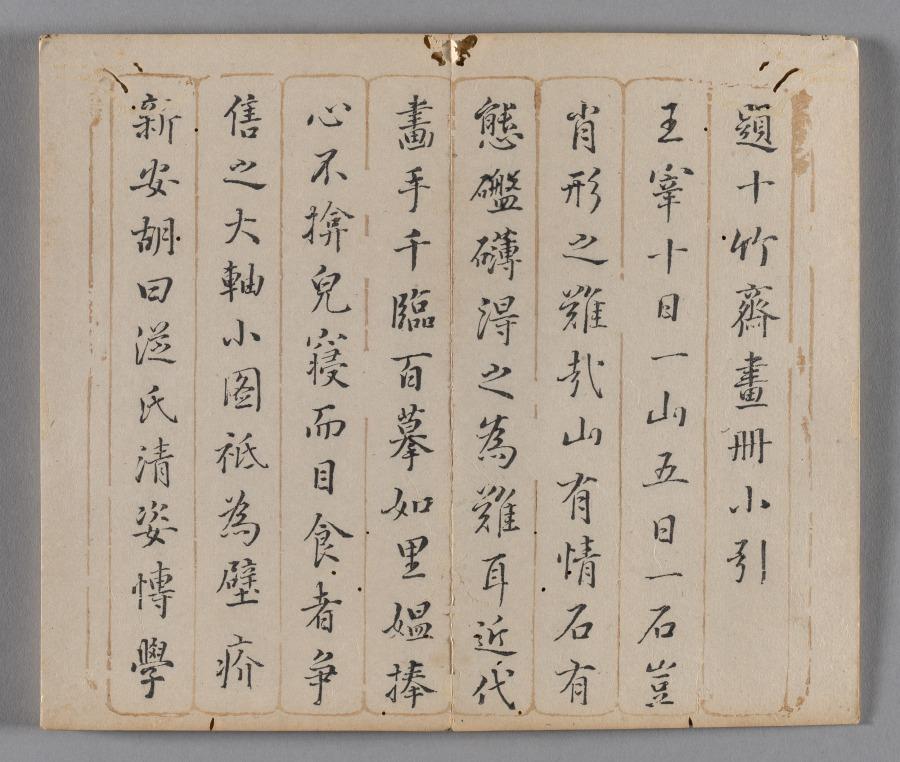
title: Ten Bamboo Studio Painting and Calligraphy Handbook (Shizhuzhai shuhua pu): Fruit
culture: China, Qing dynasty (1644-1911)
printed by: Hu Zhengyan (Chinese, c. 1584–1674)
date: 1633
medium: Woodblock-printed book; ink and colors on paper; first edition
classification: Print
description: Color printing reached a level of perfection in the early 1600s, as seen in this Ten Bamboo Studio Collection of Calligraphy and Painting and the Mustard Seed Garden Manual of Painting (printed 1679 and 1701). The painterly quality, precision in registering (aligning) the woodblocks, and harmonious colors made them the most successful color print editions in Chinese history. Both editions were printed and compiled in Nanjing, spread nationwide, and had a great impact on the arts in Japan and Korea.